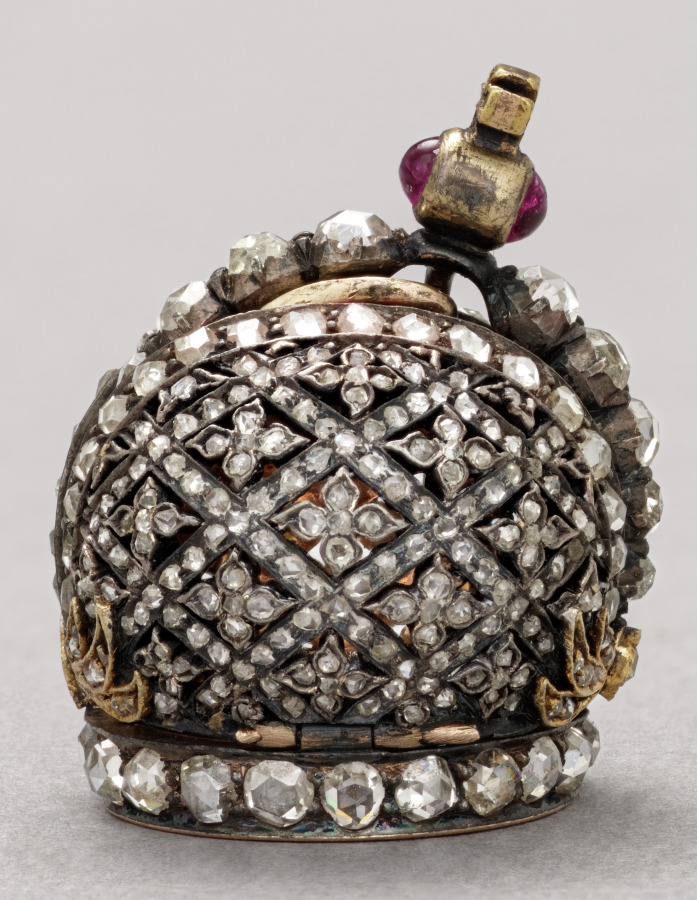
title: Miniature Crown Surprise from the Lapis Lazuli Easter Egg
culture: Russia, St. Petersburg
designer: attributed to Peter Carl Fabergé (Russian, 1846–1920)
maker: attributed to House of Fabergé (Russian, 1842–1918)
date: c. 1885–90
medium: gold, enamel, lapis lazuli, pearls, diamonds, rubies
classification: Miscellaneous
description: This Easter egg, like the subsequent ones produced by Fabergé for the imperial family, contains a surprise when opened. In this case, the egg opens to display a yellow enameled cover, resembling an egg yolk, which then opens to reveal a tiny replica of the Russian imperial crown, containing either a ruby or a pink sapphire suspended on a chain.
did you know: The tiny diamond encrusted crown surprise is a replica of the Russian imperial crown made for Empress Catherine the Great in the 1700s.